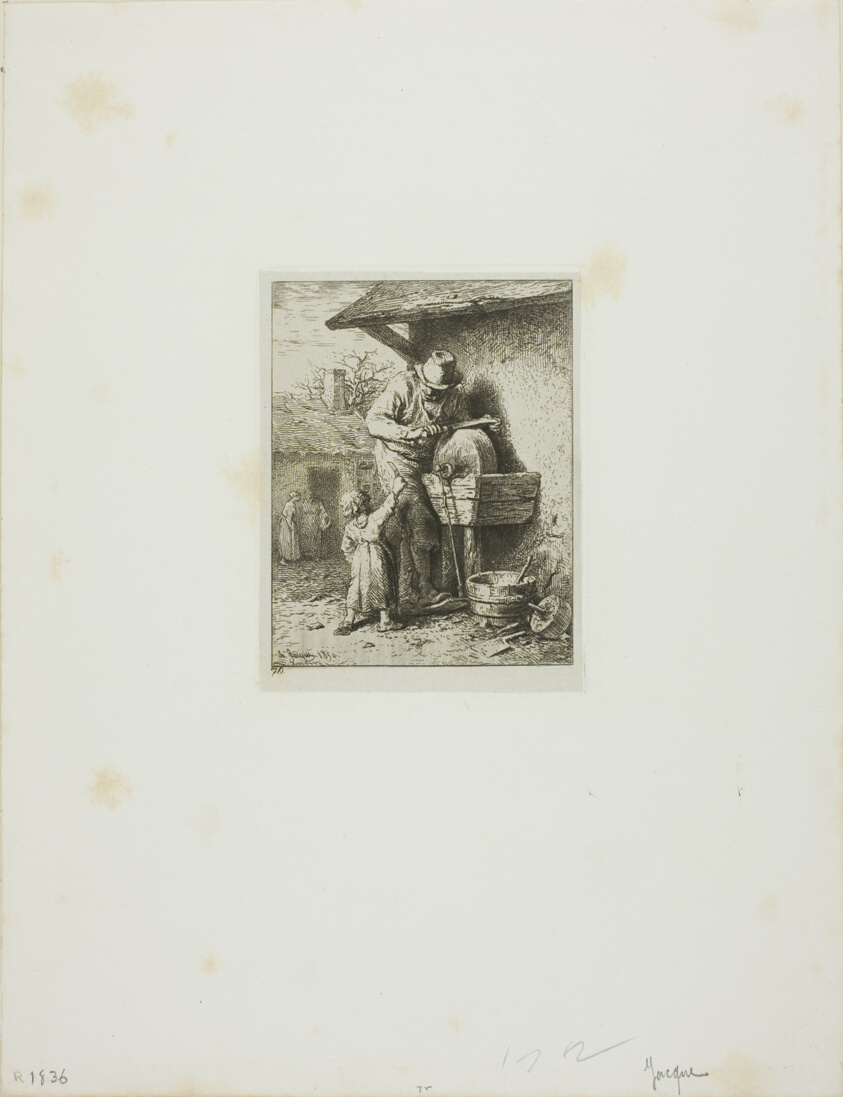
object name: Print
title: The Knife-Grinder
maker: Charles Émile Jacque (French, 1813-1894)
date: 1850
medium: Etching on light gray China paper laid down on ivory wove paper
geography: France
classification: etching; print; prints and drawing